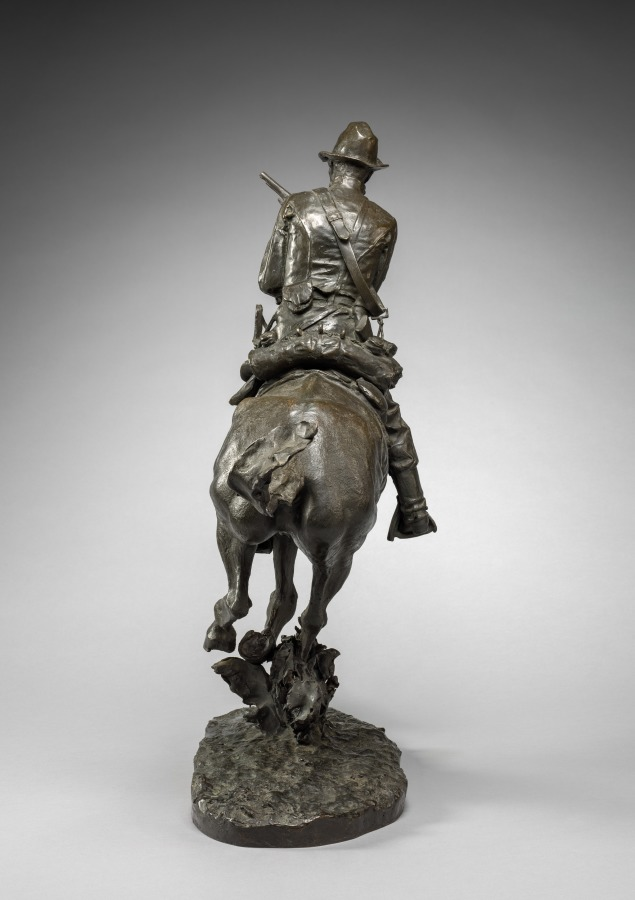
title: Trooper of the Plains-1868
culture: America, early 20th Century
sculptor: Frederic Remington (American, 1861–1909)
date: modeled 1908, cast c. 1911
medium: bronze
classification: Sculpture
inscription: Signed on top of base: Frederic Remington; Inscribed on side of base: Copyright by Frederick Remington, Roman Bronze Works, N.Y.; numbered underneath base: 3